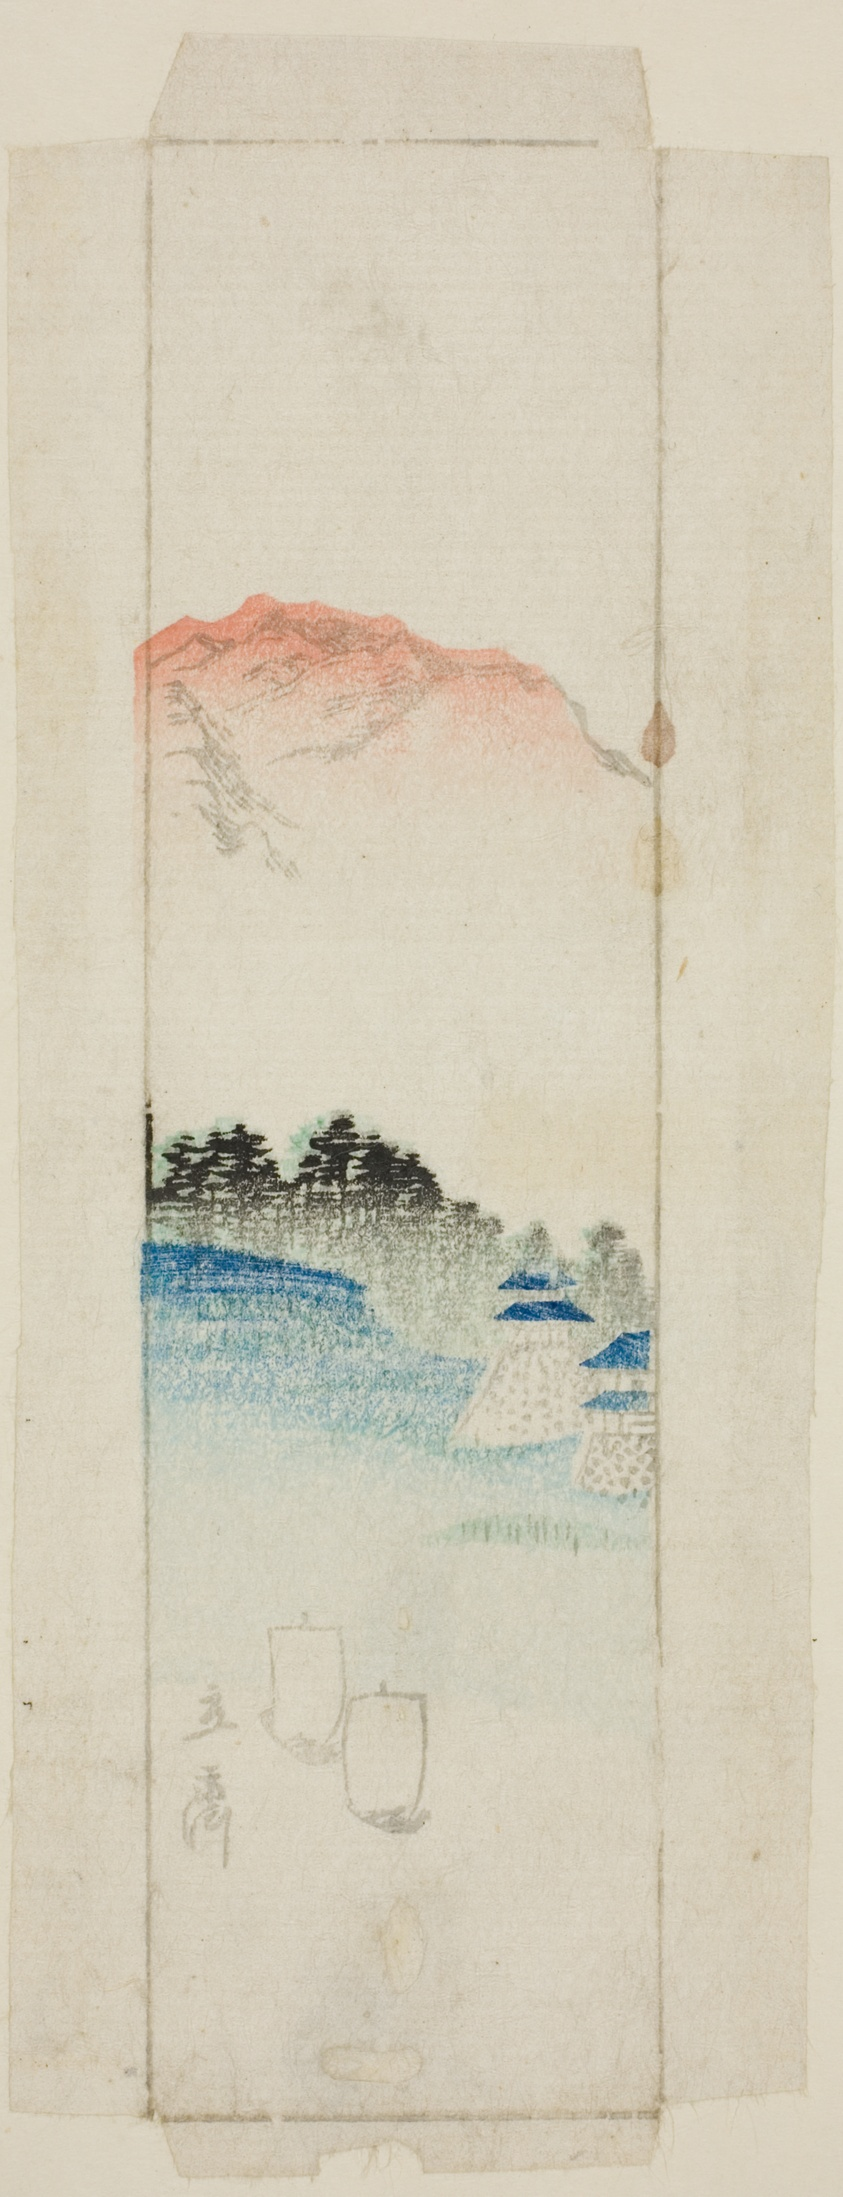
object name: Print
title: Envelope with landscape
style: Japanese (culture or style)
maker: Utagawa Hiroshige 歌川 広重; Japanese, 1797-1858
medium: Color woodblock print; envelope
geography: Japan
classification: woodblock print; print; asian art